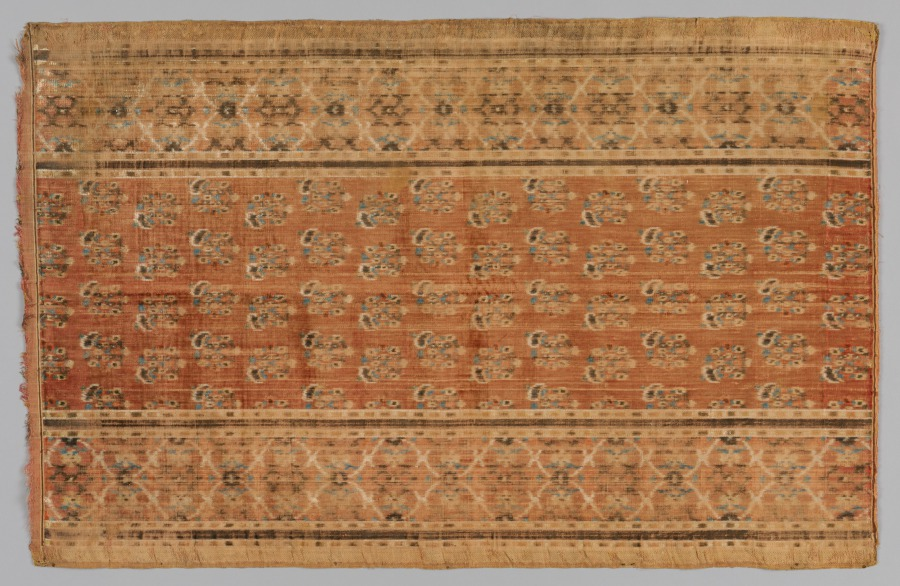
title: Velvet Panel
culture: Iran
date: 1700s–1800s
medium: velvet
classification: Velvet